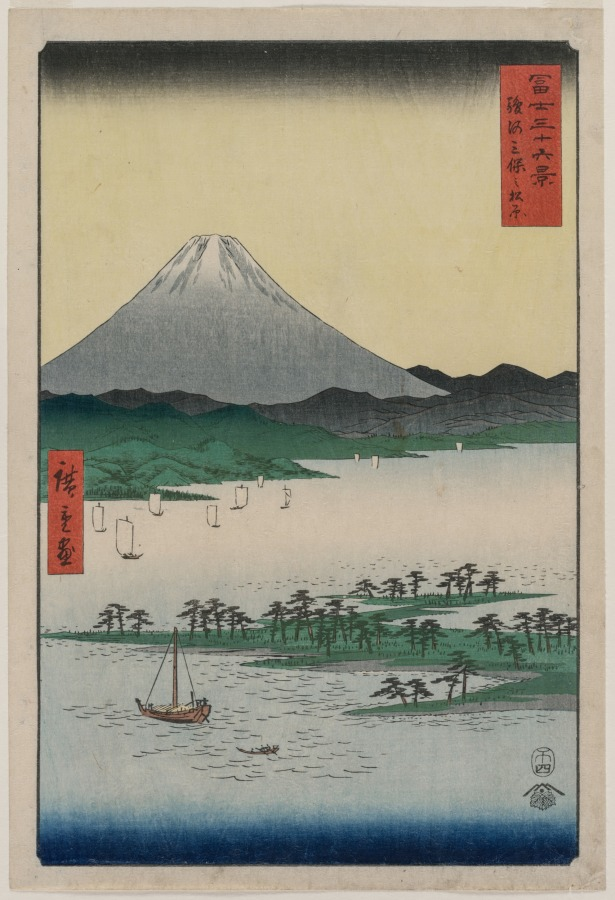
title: Pine Groves of Miho in Suruga, from the series Thirty-six Views of Mount Fuji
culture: Japan, Edo period (1615–1868)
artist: Utagawa Hiroshige (Japanese, 1797–1858)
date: 1858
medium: Color woodblock print, ink and color on paper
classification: Print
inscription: Signature: Hiroshige ga Publisher: Tsutaya Kichizo (emblem)